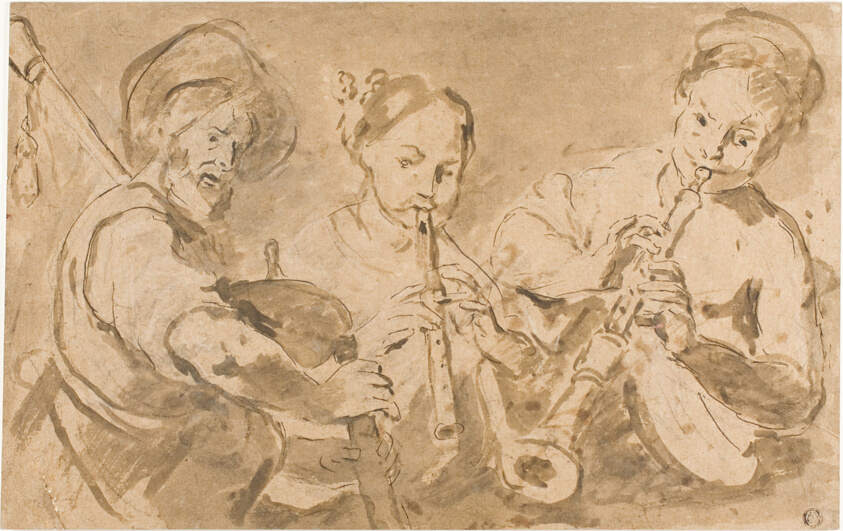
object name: Drawing and Watercolor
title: Three Musicians Playing Horns and Pipe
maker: Possibly after Bernardo Strozzi (Italian, 1581-1664); or Francis Le Piper (English, 1640-1698); or Bartolommeo Manfredi (Italian, c. 1580-c. 1620); or style of Leonard Bramer (Dutch, 1596-1674)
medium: Pen and brown ink, with brush and brown wash, over black and white chalk, on tan laid paper, laid down on ivory laid paper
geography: Italy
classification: ink or chalk wash; pen and ink drawings; paper; drawings (visual works); prints and drawing